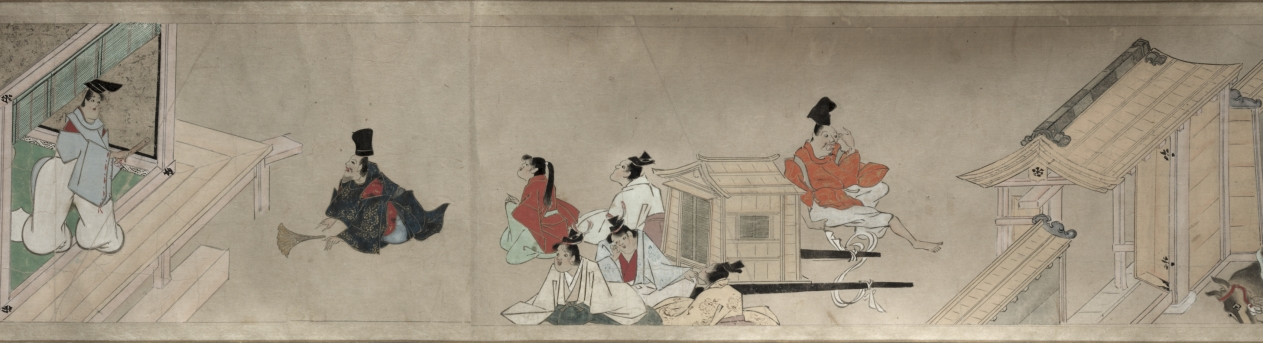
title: The Saltmaker's Story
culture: Japan, Edo period (1615–1868)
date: early 1600s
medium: One of a pair of handscrolls; ink, color, and gold on paper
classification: Painting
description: Once read and copied by girls at New Year’s celebrations and included in dowries, The Saltmaker’s Story is a rags-to-riches tale in which daughters are gifts from the gods. Despite his simple outlook, the main character progresses from humble roots as an associate at Kashima Shrine to the elite status of grandfather of the emperor through the intervention of the Kashima deity. The Saltmaker’s Story is traditionally presented in a set of three scrolls, but the text of this set has been removed by a previous owner, who remounted the illustrations as a pair. The paintings of this one take us from right to left through the second half of the tale.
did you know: This handscroll originally had texts before its paintings, but the texts were removed.